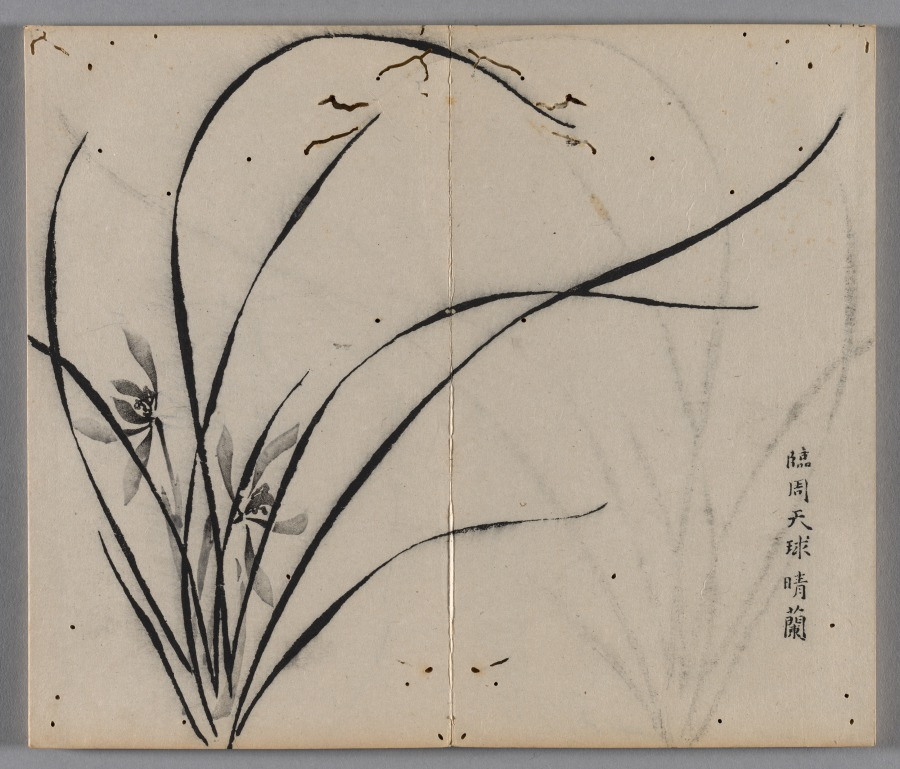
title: Ten Bamboo Studio Painting and Calligraphy Handbook (Shizhuzhai shuhua pu): Orchids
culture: China, Qing dynasty (1644-1911)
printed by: Hu Zhengyan (Chinese, c. 1584–1674)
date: 1633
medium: Woodblock-printed book; ink and colors on paper; first edition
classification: Print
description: Color printing reached a level of perfection in the early 1600s, as seen in this Ten Bamboo Studio Collection of Calligraphy and Painting and the Mustard Seed Garden Manual of Painting (printed 1679 and 1701). The painterly quality, precision in registering (aligning) the woodblocks, and harmonious colors made them the most successful color print editions in Chinese history. Both editions were printed and compiled in Nanjing, spread nationwide, and had a great impact on the arts in Japan and Korea.